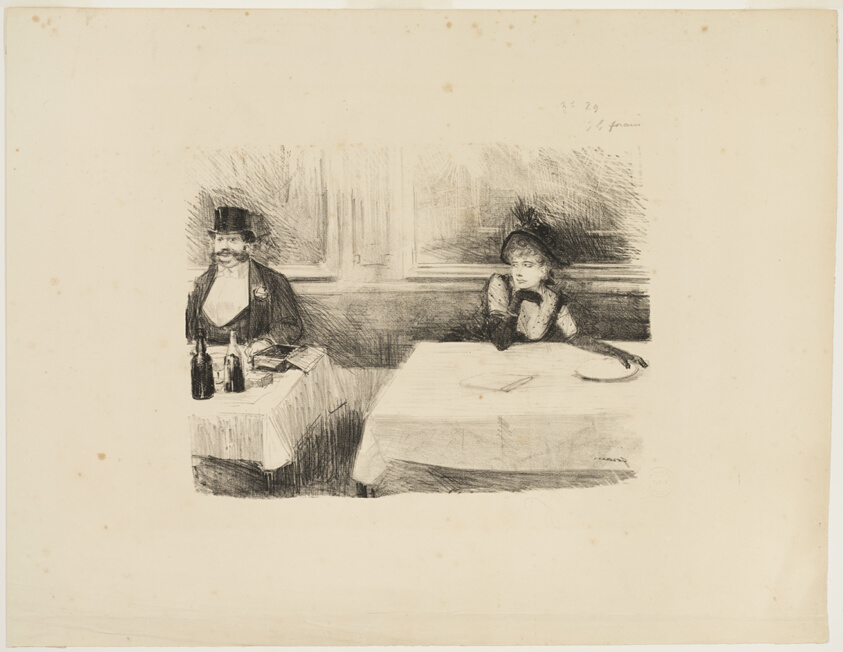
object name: Print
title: At the Restaurant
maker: Jean Louis Forain (French, 1852-1931)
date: 1890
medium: Lithograph in black on cream laid paper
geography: France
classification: lithograph; print; prints and drawing